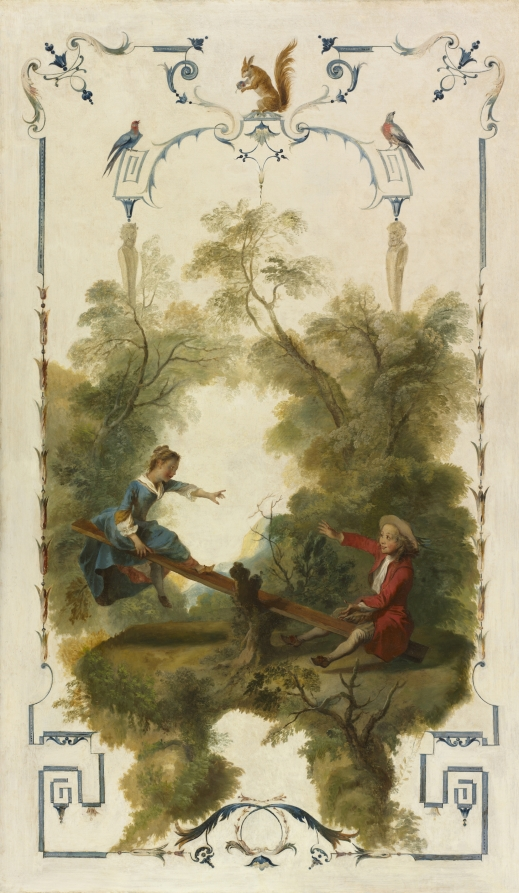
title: The See-Saw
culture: France, 18th century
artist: Nicolas Lancret (French, 1690–1743)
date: c. 1723–1727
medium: oil on canvas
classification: Painting